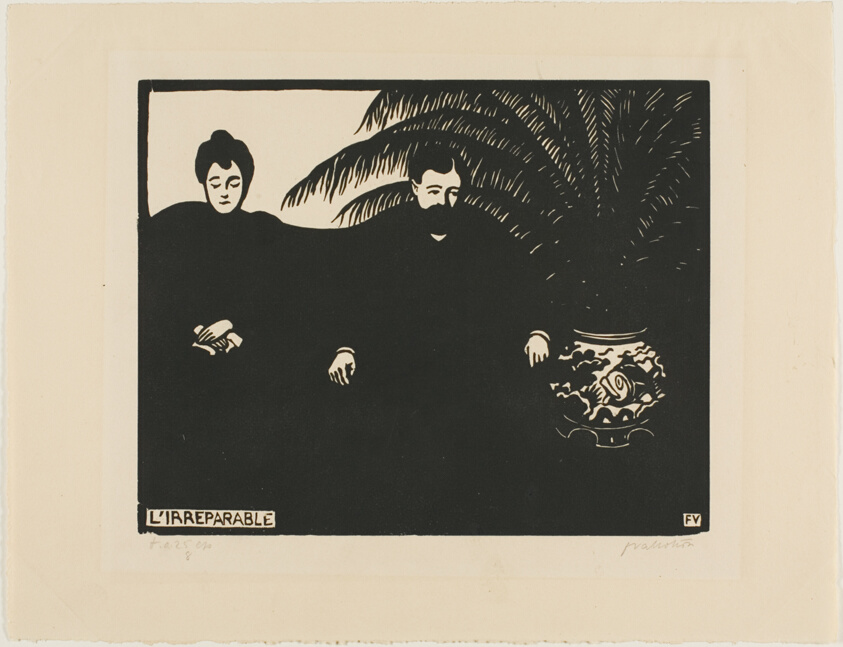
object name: Print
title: The Irreparable, plate ten from Intimacies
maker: Félix Edouard Vallotton (French, born Switzerland, 1865-1925); published by La Revue blanche (French, 19th-20th century)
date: 1898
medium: Woodcut in black on cream wove paper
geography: France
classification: woodcut; print; prints and drawing